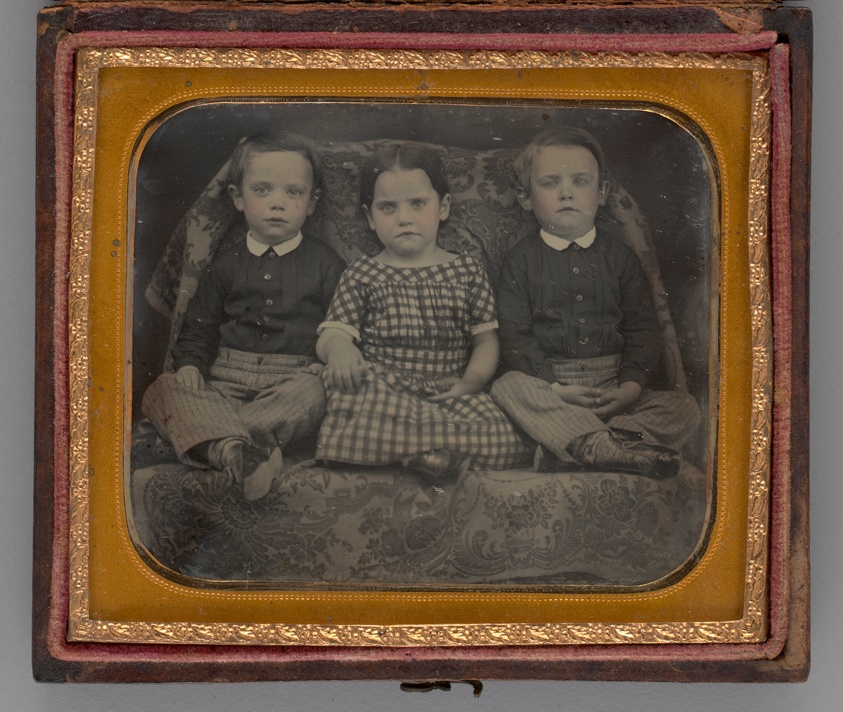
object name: Photograph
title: Untitled (Portrait of a Girl and Two Boys)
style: 19th century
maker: Unknown maker; American, 19th century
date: 1858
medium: Daguerreotype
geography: United States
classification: portrait; photograph; photographic process; photography; portrait; daguerreotype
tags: lundberg collection, portrait, girls, children, boys, portraits, portraits: child subject